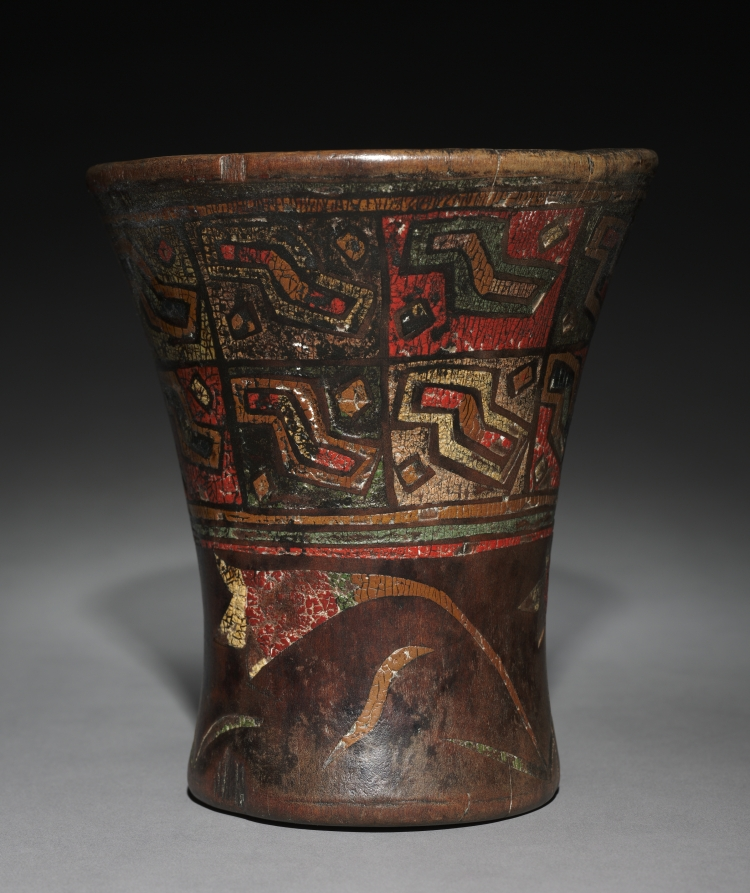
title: Kero (Waisted Cup)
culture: Peru, Colonial Inka style, 16th century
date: after 1550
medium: wood, inlaid pigments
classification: Wood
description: Keros, used to drink the maize beer chicha, were essential items of Inka statecraft. Made and used in pairs, they reflect the important Andean concept of reciprocity. Native use of keros continued in the colonial period, the date of these two examples, which come from separate pairs. The example with geometric motifs is closest to pre-conquest models. On the second, two armies converge: the Inka, dressed in tunics with waistbands, and their opponents, perhaps jungle people whose body parts are heaped in a centerpiece.